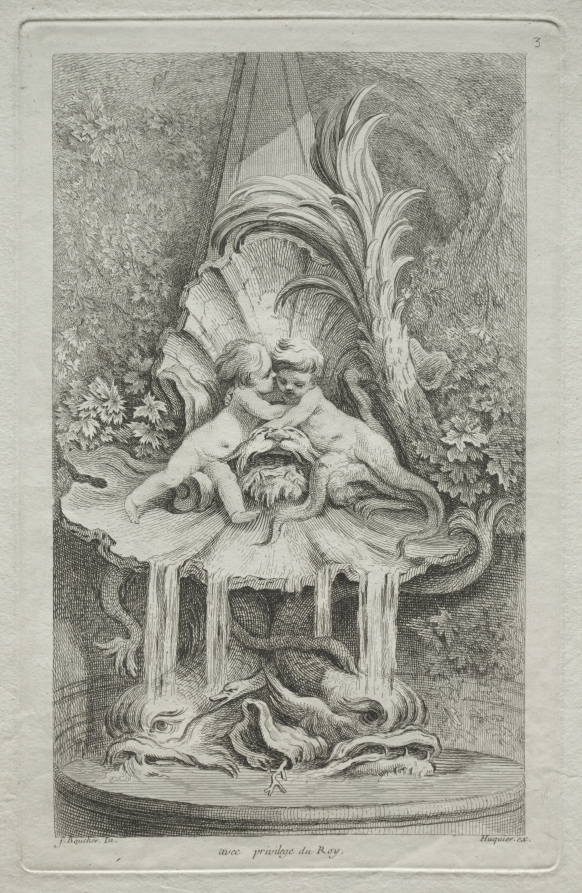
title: Book of Fountains: No. 3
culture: France, 18th century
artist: Gabriel Huquier (French, 1695–1772)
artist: after François Boucher (French, 1703–1770)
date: c. 1736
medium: etching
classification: Print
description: Boucher was one of the most prolific designers of ornament prints. With their aquatic motifs and gracefully curving and scalloped forms, these designs for fantastic, even bizarre fountains perfectly illustrate the whimsical Rococo approach. Derived from the French word for shell, rocaille, the Rococo was a light, playful style filled with shell motifs (which stemmed in part from a vogue for collecting shells), naturalistic curves, scrolls, and plant forms.